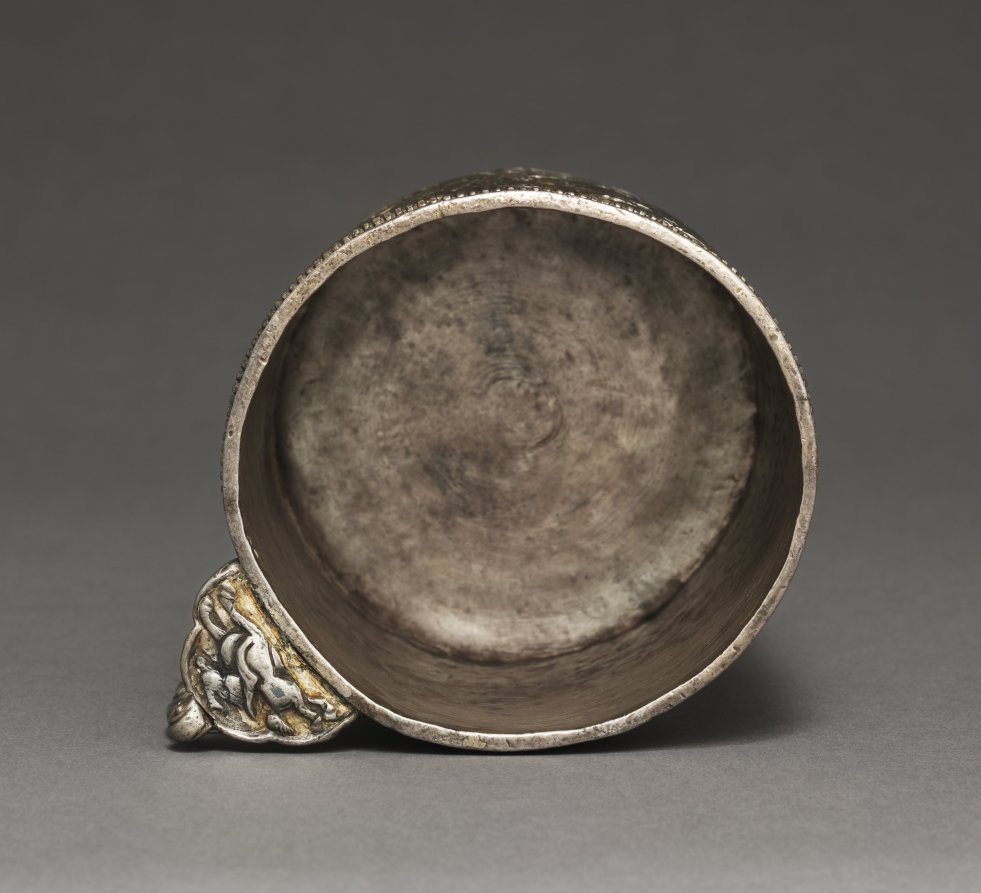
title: Beaker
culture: Central Asia (Sogdiana) or Tibet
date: c. late 600s–early 700s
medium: silver with gilding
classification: Silver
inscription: Inscribed on bottom of the cup: "Phan shing gong skyes gui sug byad (or byang)"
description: The circular shapes of the cup’s handle feature a flat edge on which the user rested their thumb for better grip, a design characteristic of silver objects made during the 700s by Sogdian artists, who traveled from Central Asia along international trade routes. An ownership inscription in Tibetan script on the underside of the cup identifies the vessel as a personal possession. The circles and lines carved below this inscription are likely measurements recording the weight of the silver used for the cup.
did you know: This cup depicts two lions and a lionlike animal with horns!